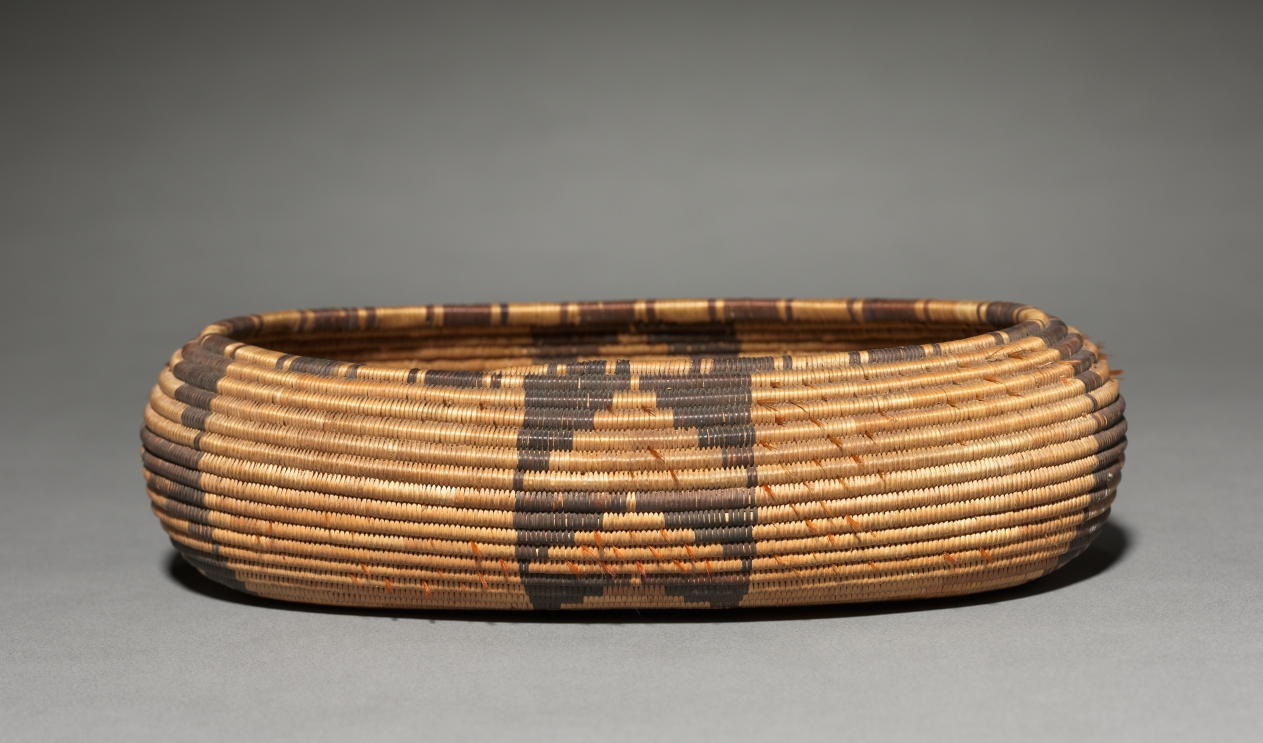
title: Gift Bowl, Canoe- Shaped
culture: California, Pomo, late 19th- early 20th century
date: 1890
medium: Willow, Bulrush, Sedge, with feather and acorn woodpecker; coiled (3 rods)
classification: Basketry